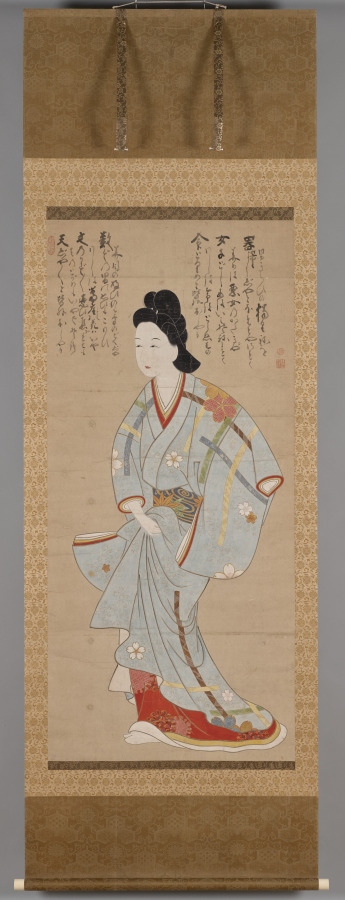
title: Figure of a Woman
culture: Japan, Edo period (1615–1868)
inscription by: Hakuin Ekaku (Japanese, 1685–1768)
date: early to mid-1700s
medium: hanging scroll; ink and color on paper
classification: Painting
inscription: Inscripton by Hakuin.